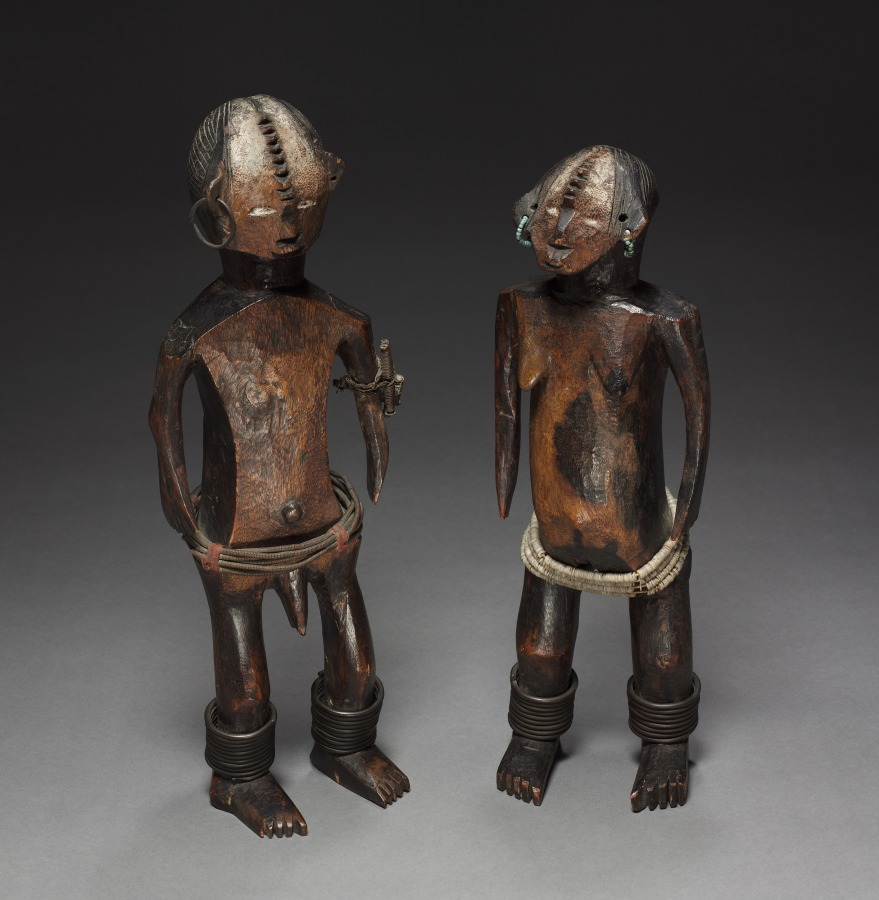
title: Pair of Figures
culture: Africa, Central Africa, Democratic Republic of Congo, probably Ngbandi-style carver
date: late 1800s-early 1900s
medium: Wood, iron alloy, copper alloy, glass beads, plant fiber, and cloth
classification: Sculpture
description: Carving of paired figures is quite well documented among the Ngbandi and its neighbors the Ngbaka-Minagende, where such sculptures are said to represent the mythical ancestor Seto and his sister-wife, Nabo. Field-based research cannot confirm the existence of figurative couples among the Ngbandi.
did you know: Odette Delenne, the collector of this pair, once stated that these figures reminded her of herself and her husband, René.